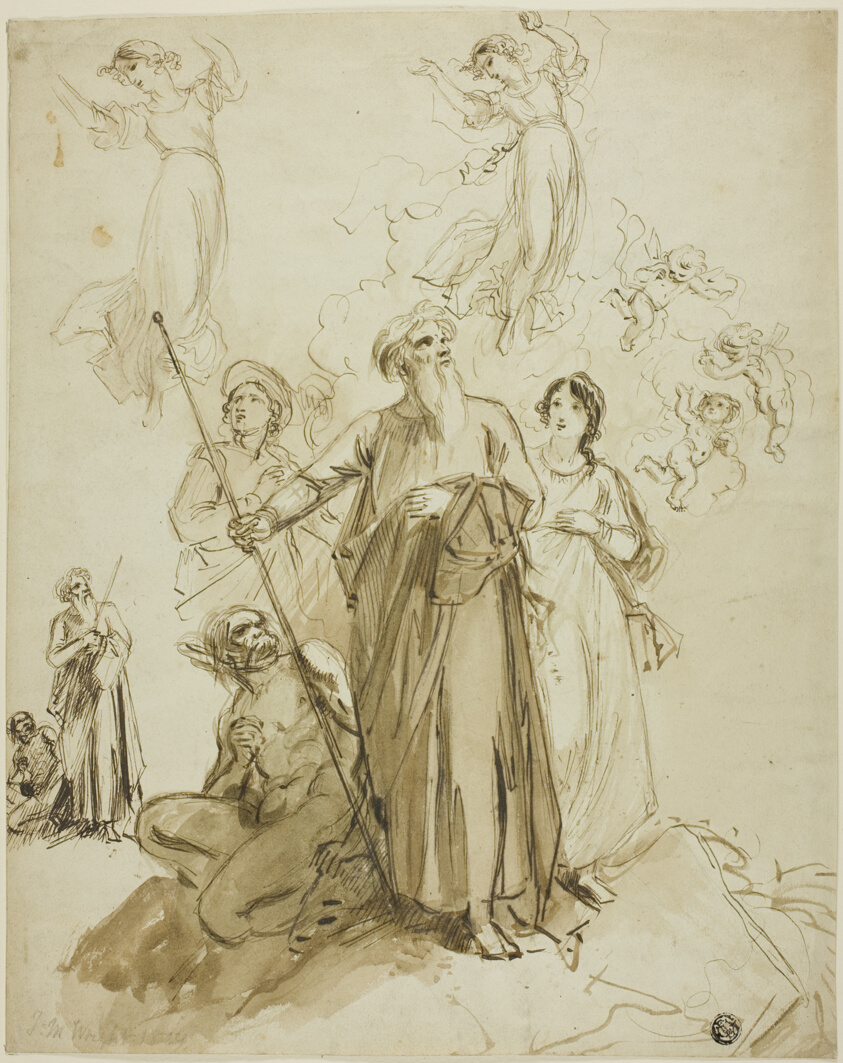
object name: Drawing and Watercolor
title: Original Studies for Shakespeare's Tempest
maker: John Massey Wright (English, c. 1773-1866)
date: 1824/29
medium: Pen and brown ink with brush and brown wash, on ivory wove paper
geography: England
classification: pen and ink drawings; drawings (visual works); prints and drawing